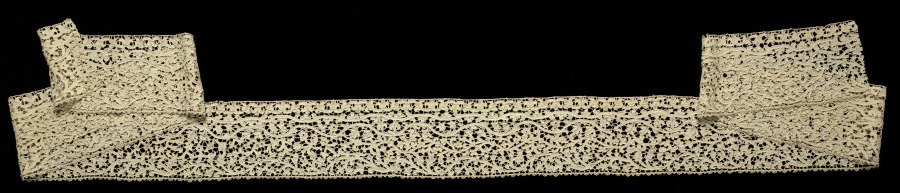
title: Lace Flounce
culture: Italy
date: 1600s–1700s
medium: Linen: needle lace and bobbin lace (Mezzo Punto)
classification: Lace